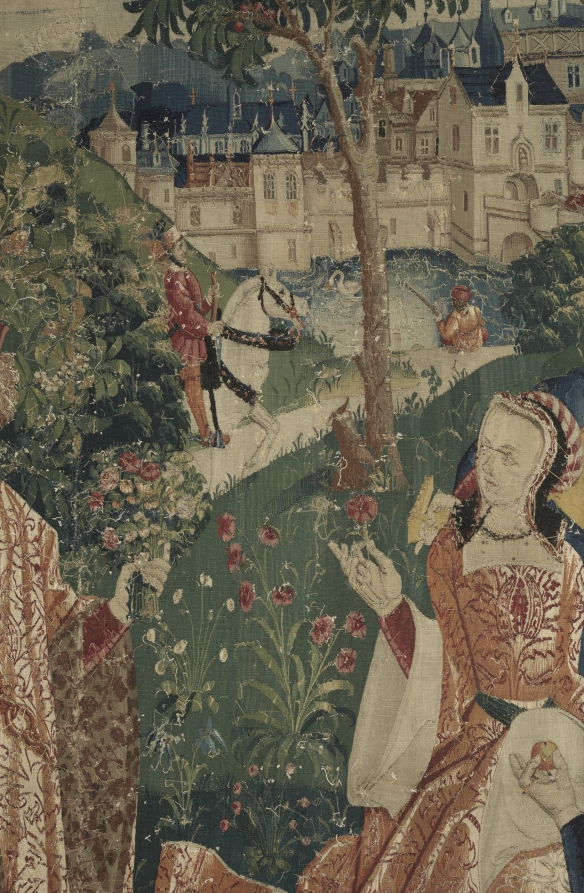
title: Time (from Chateau de Chaumont set)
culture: France, Lyon(?), early 16th century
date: 1512–15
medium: silk and wool; tapestry weave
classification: Tapestry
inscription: French verse in Gothic letters translates as follows: "One sees the weather adorned in green, Sometimes as pleasing as an angel; To suddenly change and be quite strange, The weather never stays the same."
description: Pierre Sala, who likely commissioned the set, is portrayed as the richly attired central figure offering a bouquet, a symbol of knowledge, to Éléonore, his daughter. Éléonore is pregnant, revealed by her upturned skirt and the persimmon in her husband Hector’s hand. Hector’s mother, Marguerite, in dark attire, will wed the widowed Sala in 1519. They appear in front of the royal chateau of Blois. The figures at the right convey Sala’s advice to his children. Time (the old man with the staff) with Clio, the Muse of History, standing on his shoulders, is being attacked by a Herculean youth wielding a stick. With this allegory, Sala is explaining that youth is ignorant of the complexities of life and time. The small unicorn at the far right represents the soul. The verse in Old French at the top refers to changing time: One sees Time adorned with green foliage, Sometimes as pleasant as an angel, Then suddenly change and become quite strange. Never does Time persist in one state.